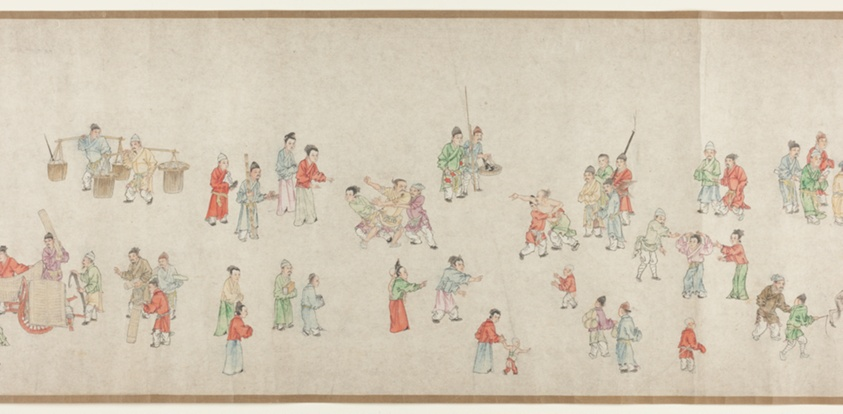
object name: Painting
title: Street Scenes in Times of Peace 太平風會圖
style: Chinese (culture or style)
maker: Zhu Yu (Zhu Junbi) 朱玉（朱君璧）; Chinese, 1293-1365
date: Yuan dynasty (1279–1368), 14th century 元朝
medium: Handscroll; ink and colors on paper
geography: China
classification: handscroll; painting; asian art